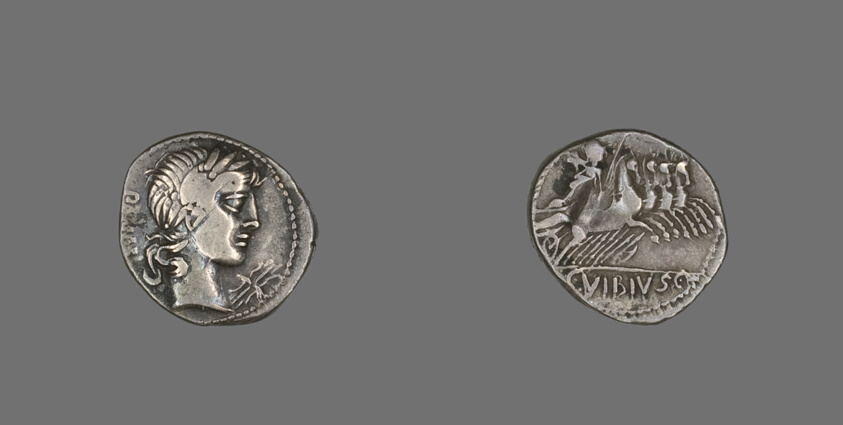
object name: Coin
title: Denarius (Coin) Depicting the God Apollo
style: republic period, ancient, roman (ancient, style or period)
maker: Roman, minted in Rome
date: 90 BCE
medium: Silver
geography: Italy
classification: coin; ancient art; struck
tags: gods (deities), Chariots